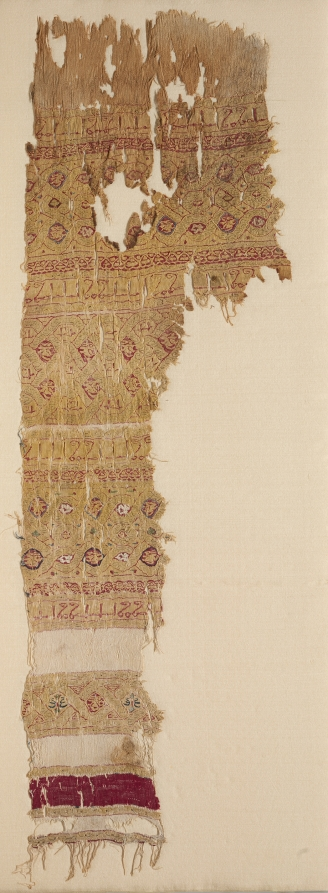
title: Tiraz with guilloche bands and fringe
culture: Egypt, Fatimid period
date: 1100s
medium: linen and silk: plain weave with inwoven tapestry weave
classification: Textile